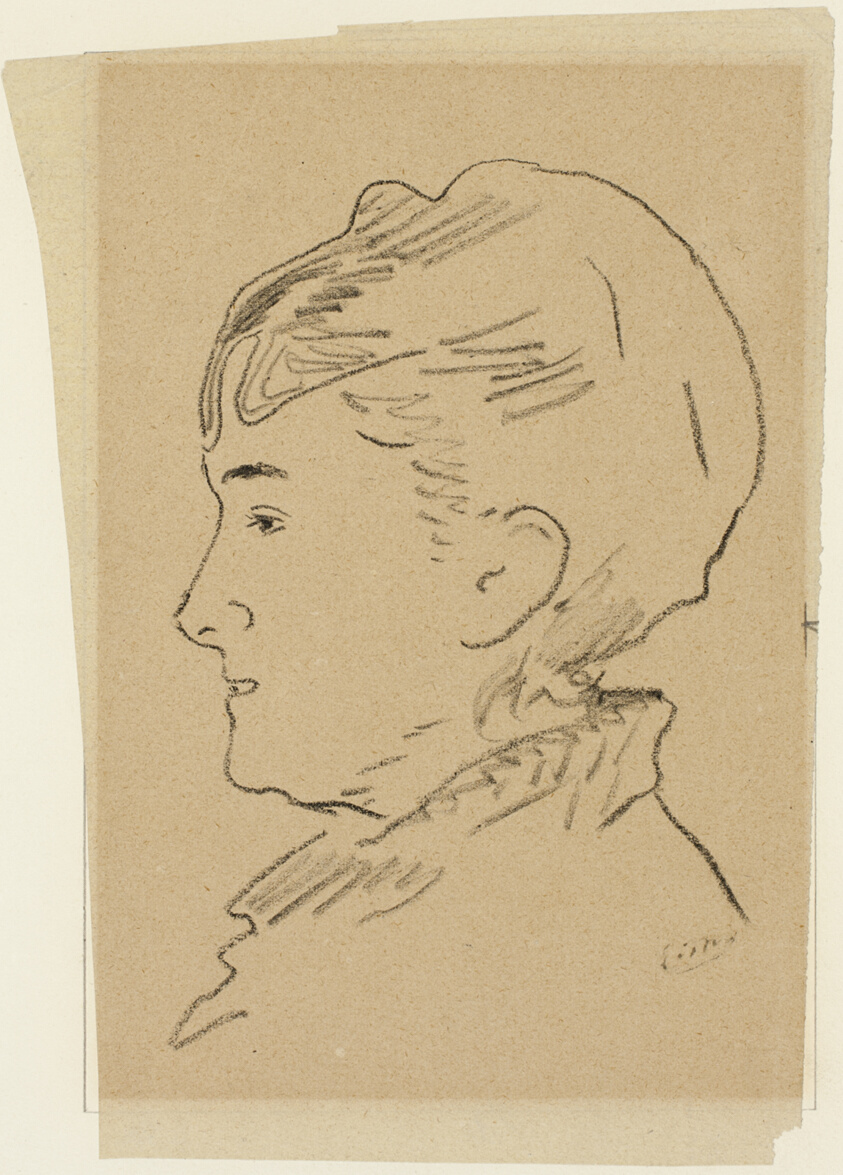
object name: Drawing and Watercolor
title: Mademoiselle Isabelle Lemonnier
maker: Attributed to Édouard Manet; French, 1832-1883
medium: Black crayon on cream wove tracing paper (discolored to tan), laid down on ivory wove paper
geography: France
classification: crayon; drawings (visual works); prints and drawing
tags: Century of Progress, world's fairs, Chicago World's Fairs